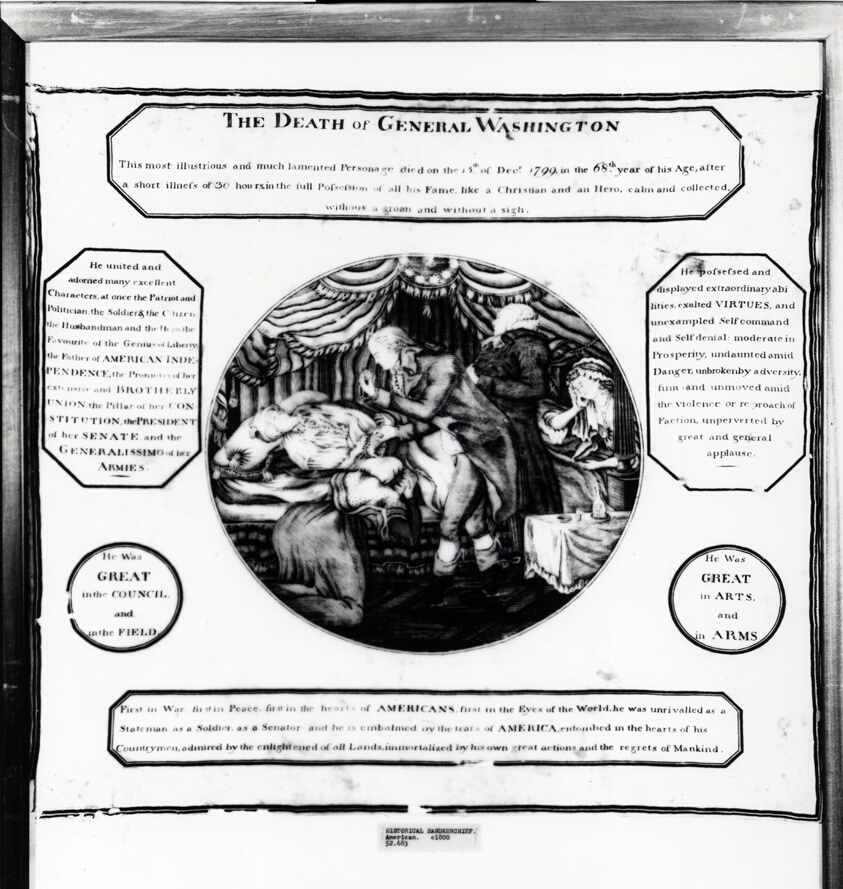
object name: Textile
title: Death of General Washington (Handkerchief)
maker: United States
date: 1799/1800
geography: United States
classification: textile; weaving - printed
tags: propaganda